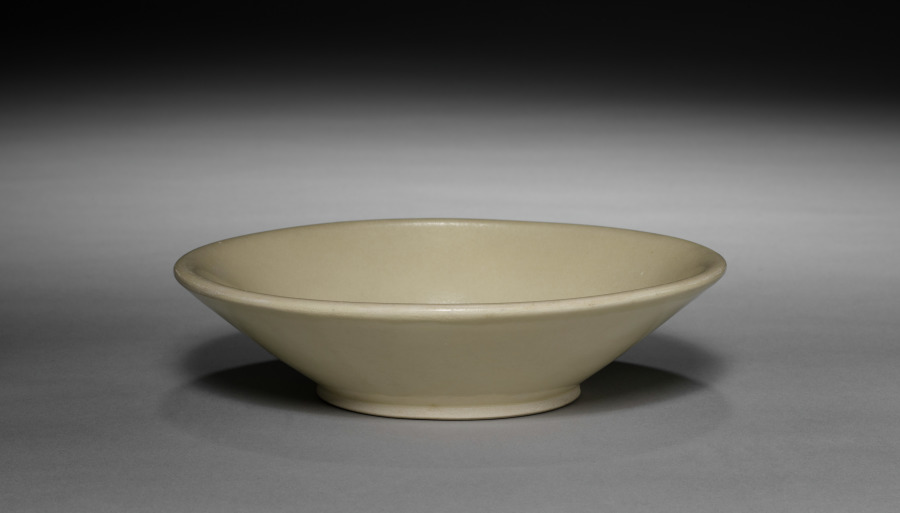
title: Ding Ware Bowl of the Xing Type with Bi-Disc Foot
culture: China, Henan province, Gongxian kilns, Five dynasties (907–60)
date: 907–60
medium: White stoneware with ivory-white glaze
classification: Ceramic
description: An ivory-colored glaze covers this shallow bowl with a solid flat foot ring, revealing an almost pure white body. Bowls of this type and shape were used for drinking tea and were traded as far as Samarra (modern Iraq). Red tea consumed during the Tang dynasty (618–906) was believed to look best in pale green or white-glazed bowls. When white whisked powdered tea was introduced a century later during the Song dynasty (960–1279), tastes and aesthetics for tea ceramics changed and dark-glazed teabowls were preferred.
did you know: The bowl’s foot ring is shaped like a Neolithic bi (璧), a flat jade disc with a central circular hole, which had some ritual function.